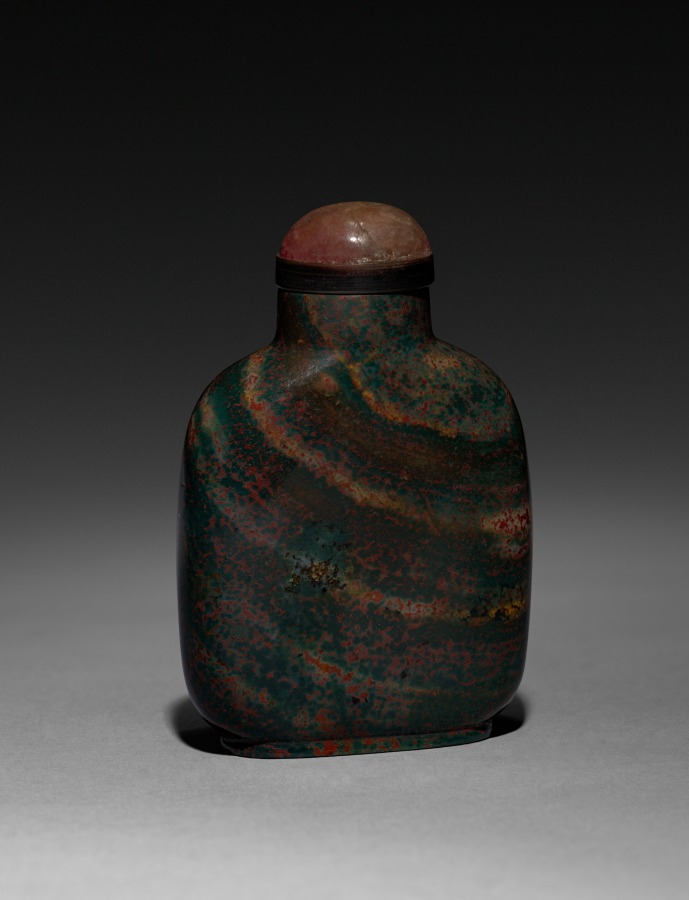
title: Snuff Bottle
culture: China, Qing dynasty (1644-1911)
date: 1644–1911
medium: glass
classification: Glass